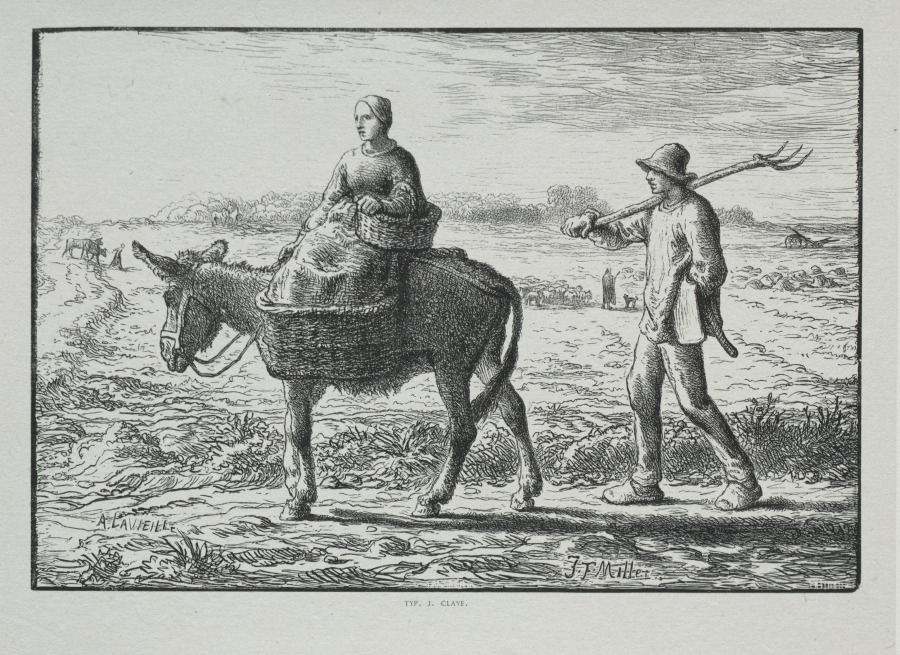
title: Four Hours of the Day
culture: France, 19th century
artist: Adrien Lavieille (French, 1818–1862)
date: 1860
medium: wood engraving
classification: Print